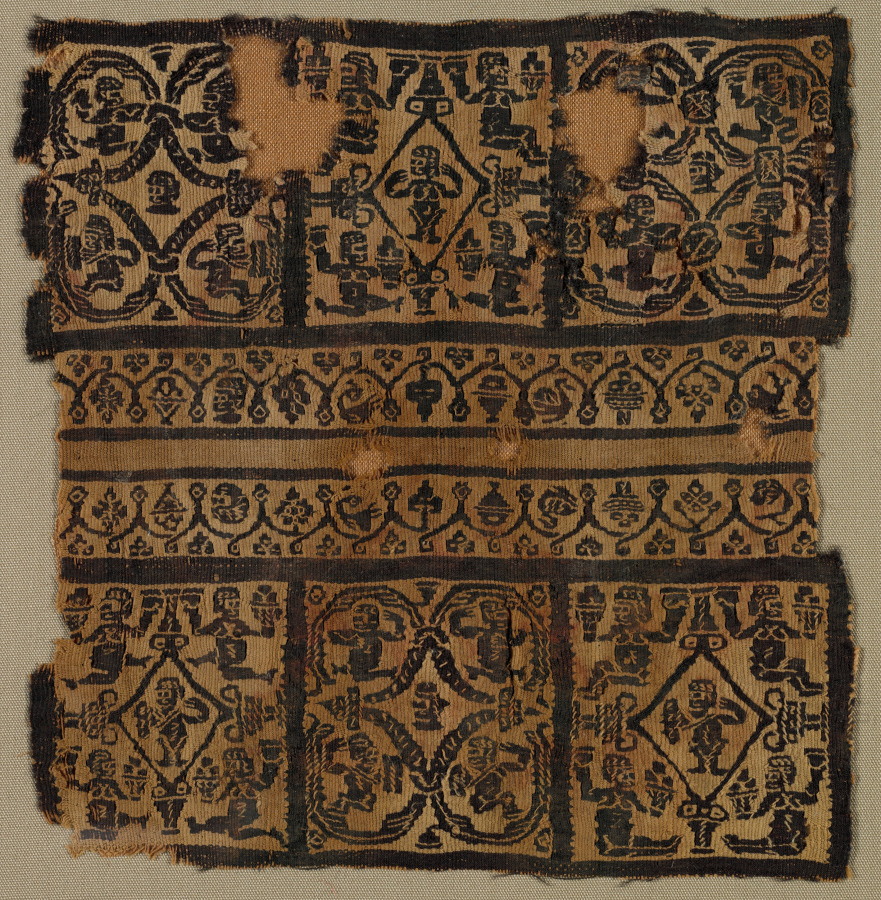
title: Fragment, Sleeve Ornament from a Tunic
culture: Egypt, Byzantine period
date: 500s - early 600s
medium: tapestry (probably originally inwoven in tabby ground); wool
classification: Textile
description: This fragment originally decorated a tunic, the prevalent garment worn by adults and children around the Byzantine Mediterranean. Six square panels feature stylized human figures in various states of movement. With baskets and vessels in hand, they sit, stand, and leap within the scenes. Separating the square panels in the middle, two decorative bands depict alternating stylized figural busts, birds, baskets, and vegetal motifs. Tunic decoration such as this provided wearers a way to express their social status through clothes.